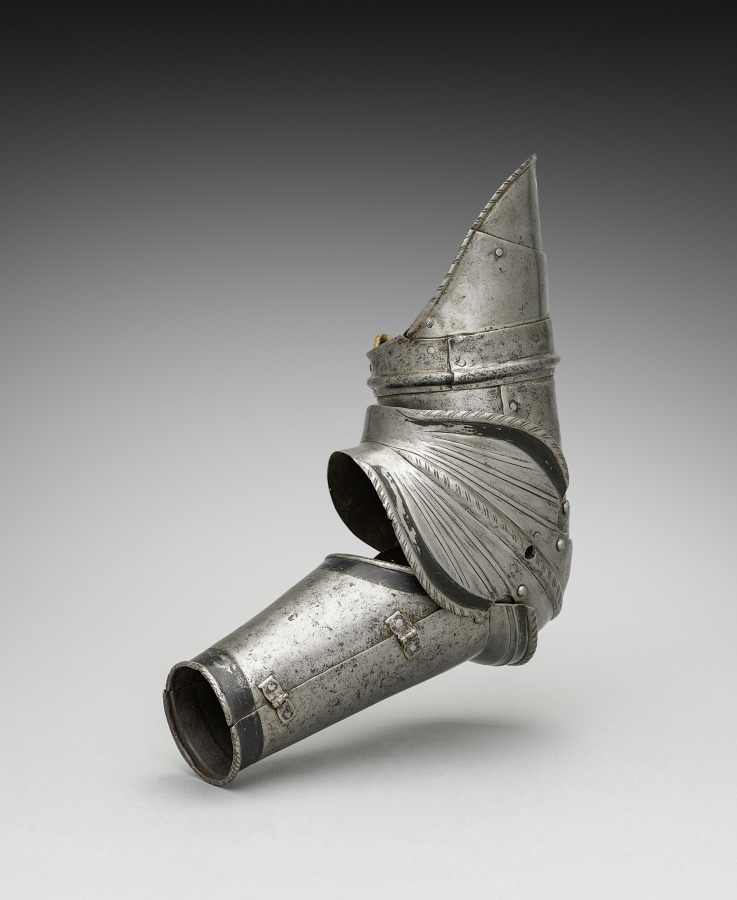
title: Left Vambrace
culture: Germany, 19th century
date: 1801–1900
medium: steel with black paint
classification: Arms and Armor